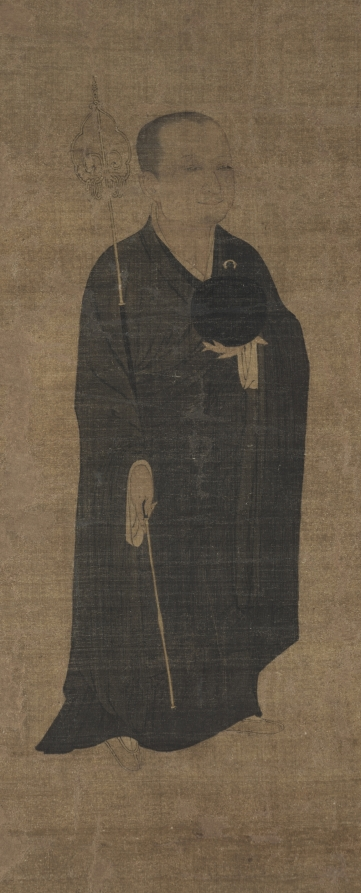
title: Portrait of Priest Dazhi (1048–1116), Master of Law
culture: China, Southern Song dynasty (1127-1279)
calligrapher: Liu Tao (Chinese, late 1000s–early 1100s)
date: 1100s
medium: Hanging scroll; ink and light color on silk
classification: Painting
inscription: Inscription by Liu Tao (late 1000s–early 1100s): Dignified with the perfection of the upasampada,/ His appearance is like his mind;/ Uncompromising and loftily aloof,/ His mind is like his appearance./ To say he is square, he proves to be round;/ He looks timid, yet his spirit is unbound./ Having no attachment, and holding no reins,/ Man and deities alike take refuge in him. (Translation by WKH, 1980)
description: Monk Yuanzhao, with the honorific title Dazhi Lüshi, Great Wisdom Master of Vinaya, is depicted here as an itinerant monk, holding his alms bowl in the left and staff in the right. In 1142, Emperor Gaozong had bestowed Yuanzhao with a posthumous title, mentioned in the inscription, which suggests that the portrait was made after the master’s death. A master of the Lü sect of Buddhism, with a calm benevolent smile on his face, Yuanzhao was active on Mount Tiantai and in Hangzhou. Later, Liu Tao, a southerner from Changxing, added the inscription. The eulogy reads: Dignified he is, perfect in his upasampada [ordination of a monk]. His appearance is like his mind. Uncompromising and aloof. His mind is like his appearance. To say he is square, he proves to be round. He looks timid, yet his spirit is unbound. Having no attachment, and holding no reins, men and deities alike take refuge in him. —translated by Wai-Kam Ho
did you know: A native of Hangzhou, the priest Dazhi was known for his eloquent exposition of Buddhist doctrines and for his success in winning many converts.